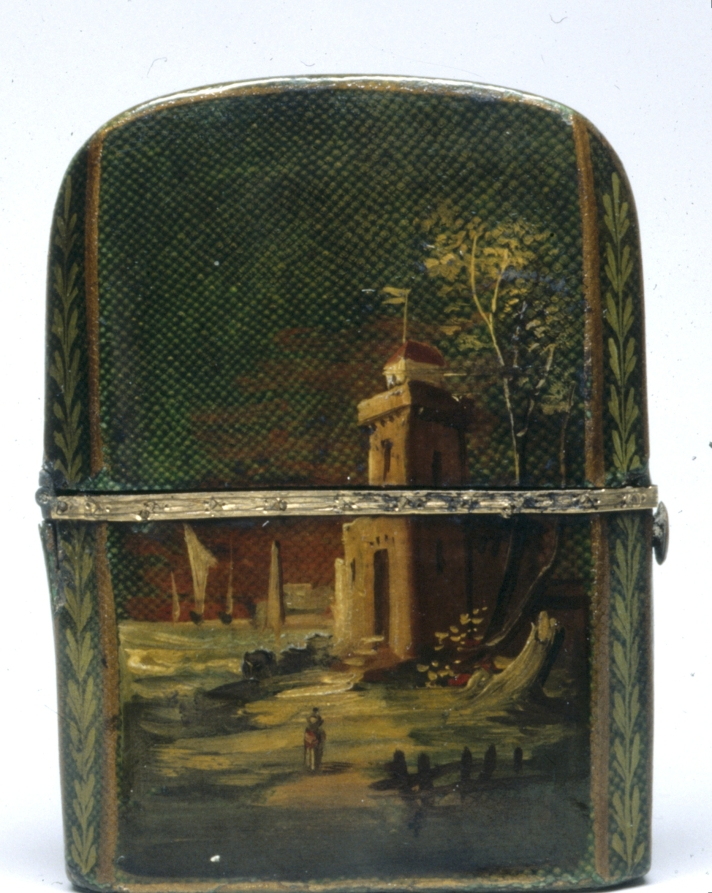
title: Necessaire with Scent Bottles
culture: France, early 19th century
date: early 1800s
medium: painted wood with gold mounts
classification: Miscellaneous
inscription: inscribed in ink inside cover: "Alex."